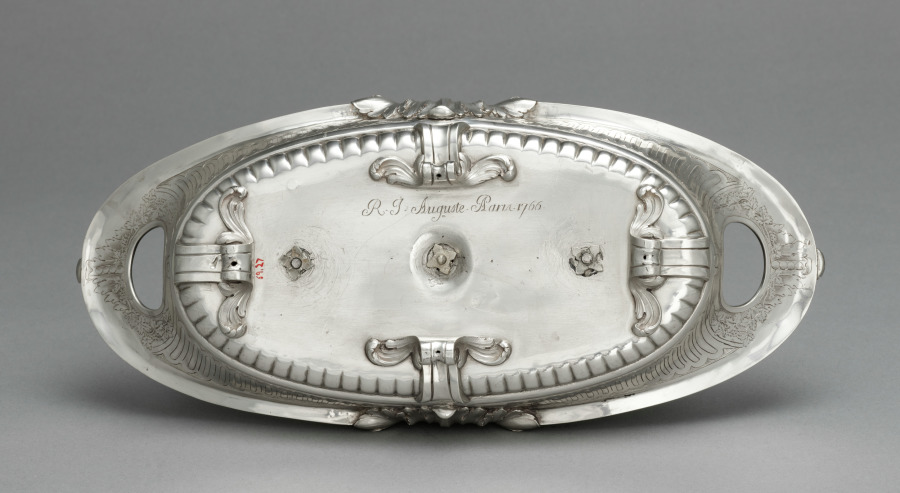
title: Cruet Stand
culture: France, 18th century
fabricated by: Robert Joseph Auguste (French, 1723–after 1795)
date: 1766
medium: silver and glass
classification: Silver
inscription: inscribed on base: R. J. Auguste Paris 1766.